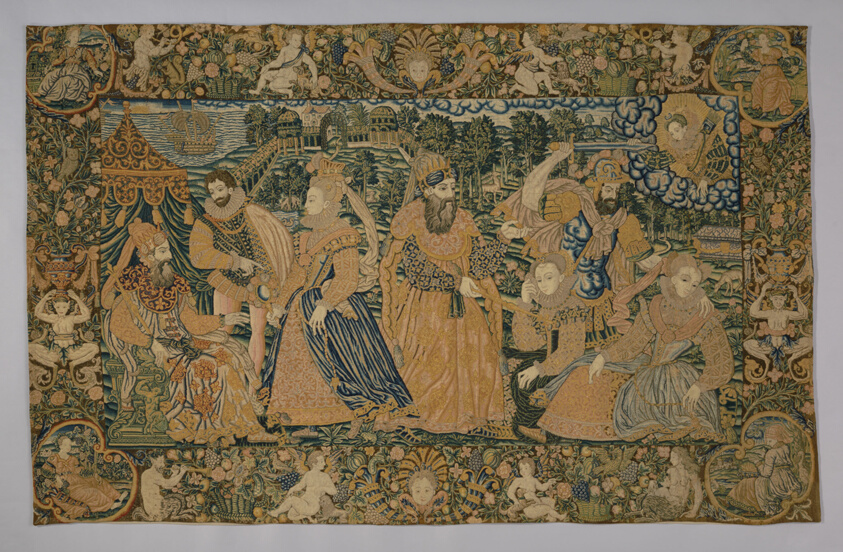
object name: Textile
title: Hanging (Depicting the Story of Esther and King Ahasuerus) (Needlework)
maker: France or England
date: 1575/1600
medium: Linen, plain weave; embroidered with silk and wool in tent and cross stitch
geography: France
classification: textile; needlework (visual works)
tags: religious scenes